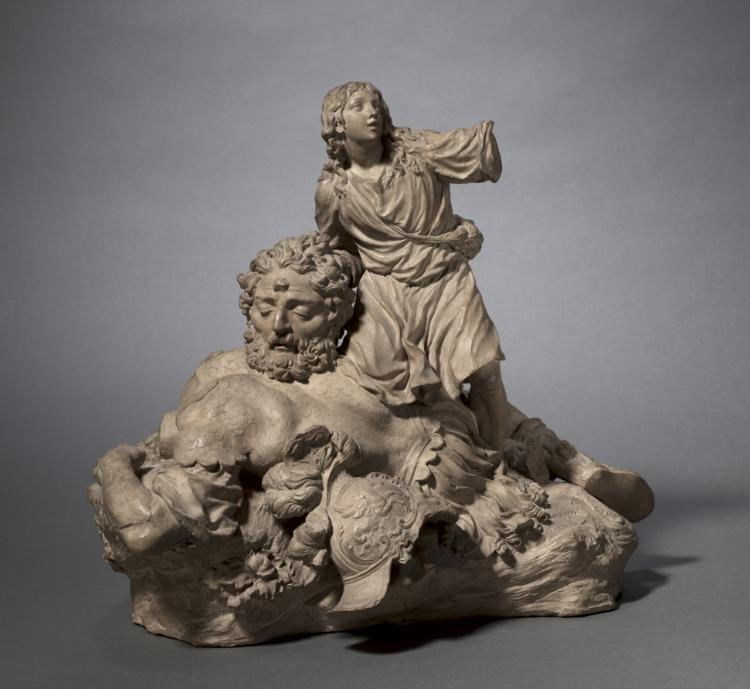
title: David Victorious over Goliath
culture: Italy, Florence, 18th century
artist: Giovanni Battista Foggini (Italian, 1652–1725)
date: 1722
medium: terracotta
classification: Sculpture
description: This terracotta model was used to cast part of a series of bronzes on religious subjects. Foggini depicted David humbly, a compelling contrast to the more traditional Florentine approach of David as a proud victor. The subject of David was especially important because he had long symbolized Florence: the city was often able to overcome its larger rivals, much like David defeated the giant Goliath.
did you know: David was a popular figure in Florentine art and often embodied civic liberty.